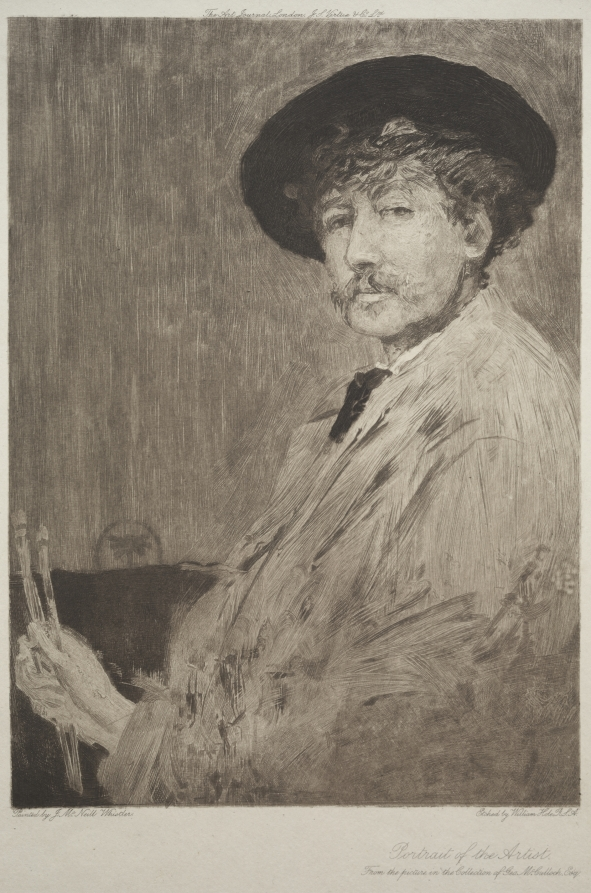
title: James McNeill Whistler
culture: England, late 19th Century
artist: William Brassey Hole (British, 1846–1917)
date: 1897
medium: etching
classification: Print